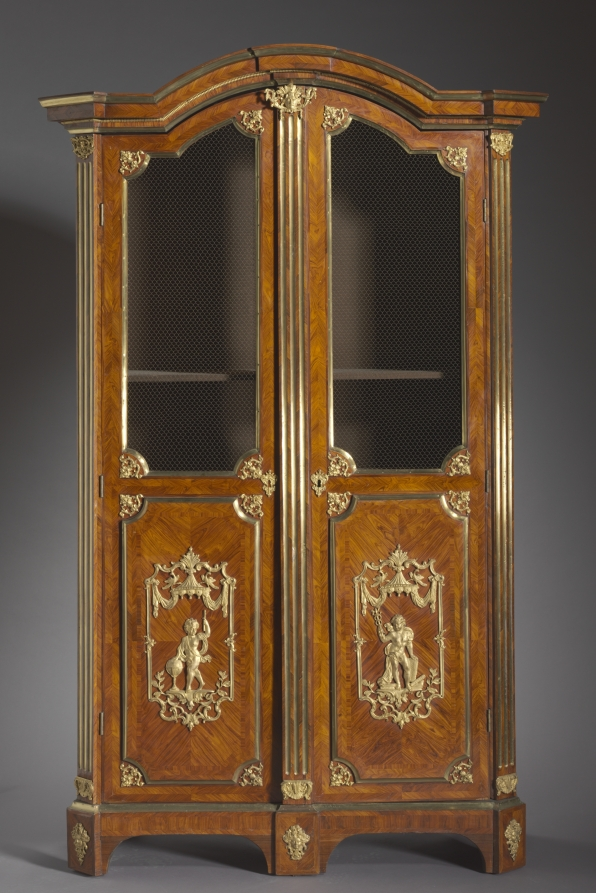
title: Bookcase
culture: France, 18th century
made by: attributed to Charles Cressent (French, 1685–1768)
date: c. 1720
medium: kingwood and rosewood veneers, gilt metal mounts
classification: Furniture and woodwork